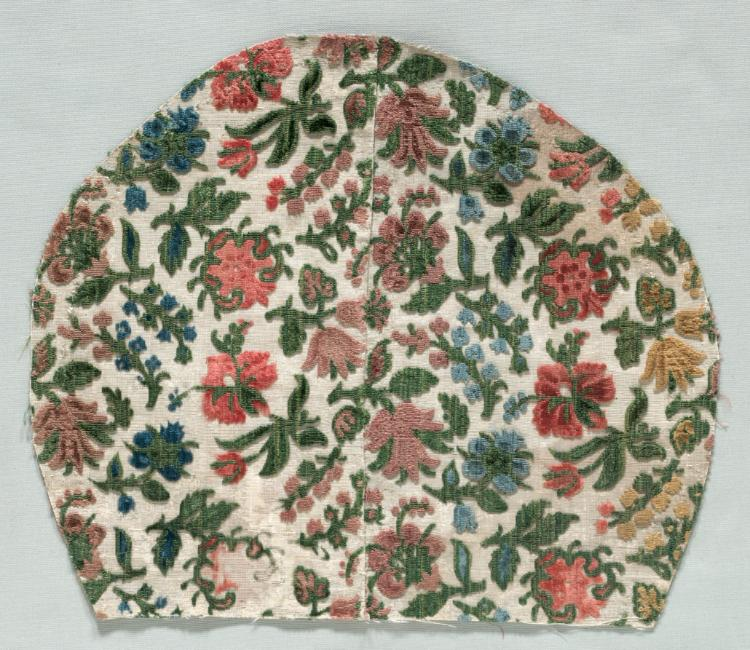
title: Velvet Fragment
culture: Italy, Genoa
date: late 1600s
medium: velvet (cut, uncut, voided); silk and metallic threads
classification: Velvet